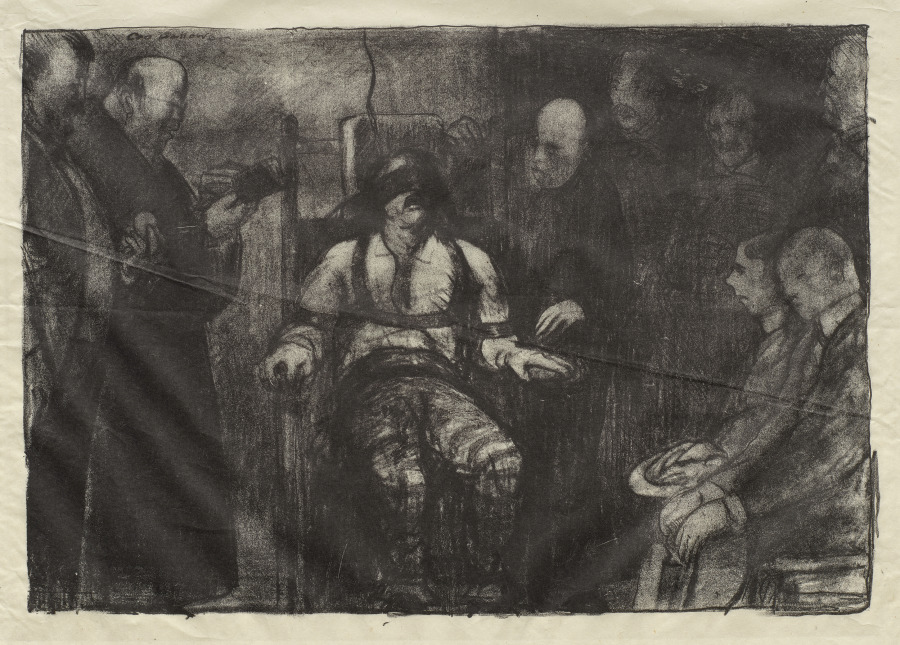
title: Electrocution, first state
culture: America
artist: George Bellows (American, 1882–1925)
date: 1917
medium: lithograph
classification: Print